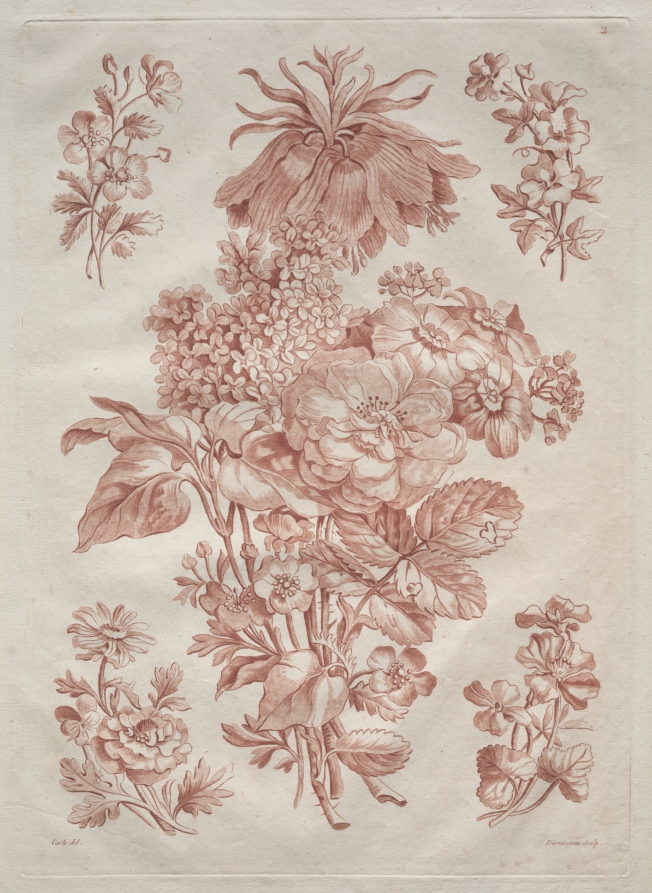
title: Spray of Flowers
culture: France, 18th century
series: Studies of Flowers after Nature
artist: L. F. Duruisseau (French, born 1754)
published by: Roubillac (France, 18th Century)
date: c. 1774–1800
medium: chalk-manner etching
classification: Print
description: Crayon manner etching was invented in the 18th century to simulate the texture of chalk drawings, which were very popular at the time. A tool with toothed points of varying thicknesses set at irregular intervals and angles (mattoir) imitated the random character of grains of chalk on textured paper. Etudes de fleurs d’après nature demonstrates how prints propagated floral designs that could be used in the applied arts. Artisans designing textiles or decorating furniture, for instance, were inspired by the compositions found on prints.